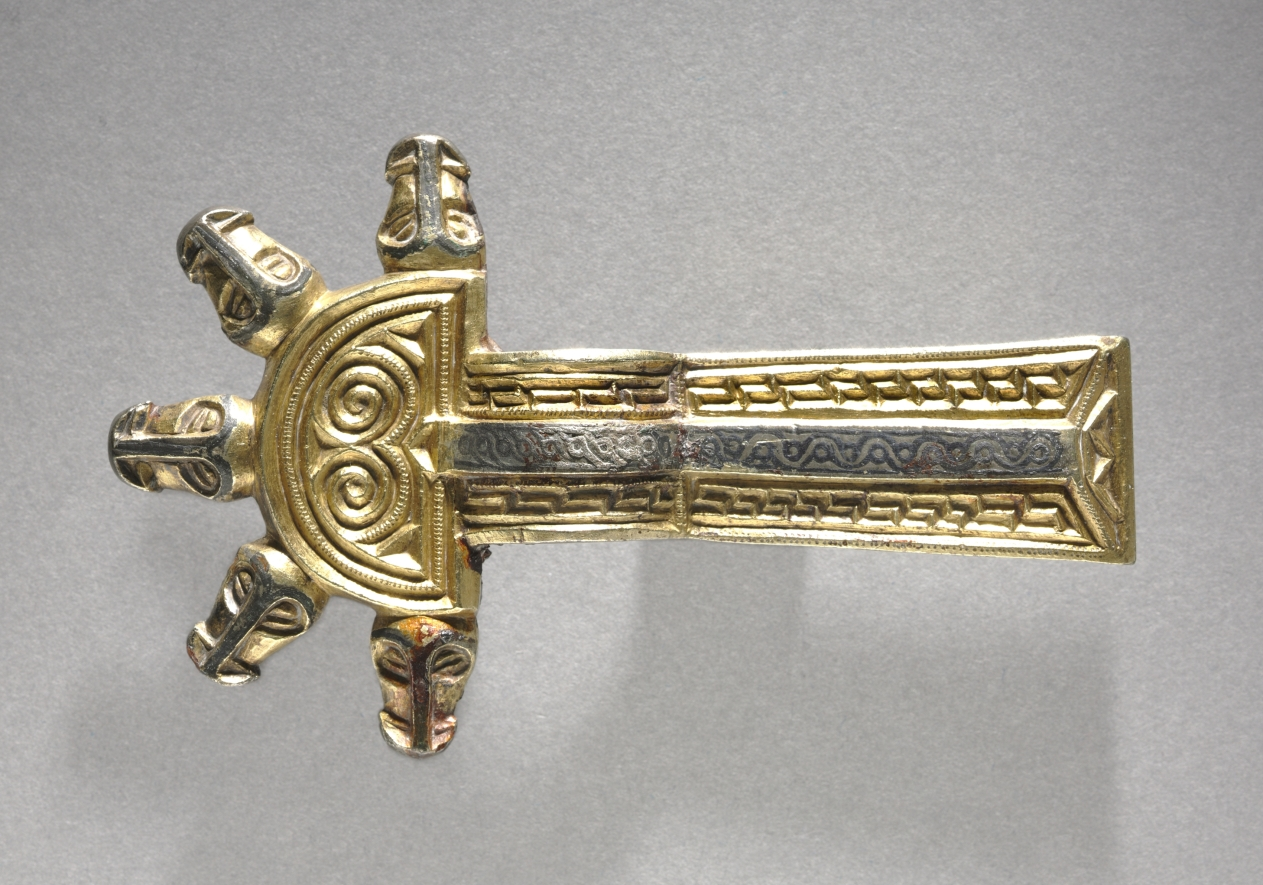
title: Fibulae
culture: Alemannic, Migration Period, 6th-7th century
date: 500s-600s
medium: cast silver, parcel-gilt, with niello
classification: Jewelry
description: A woman of high rank might have worn these twin fibulae on her shoulders, one fastening her inner garment on the right, the other her outer garment on the left. She might also have suspended them from her belt as decorative ornaments.